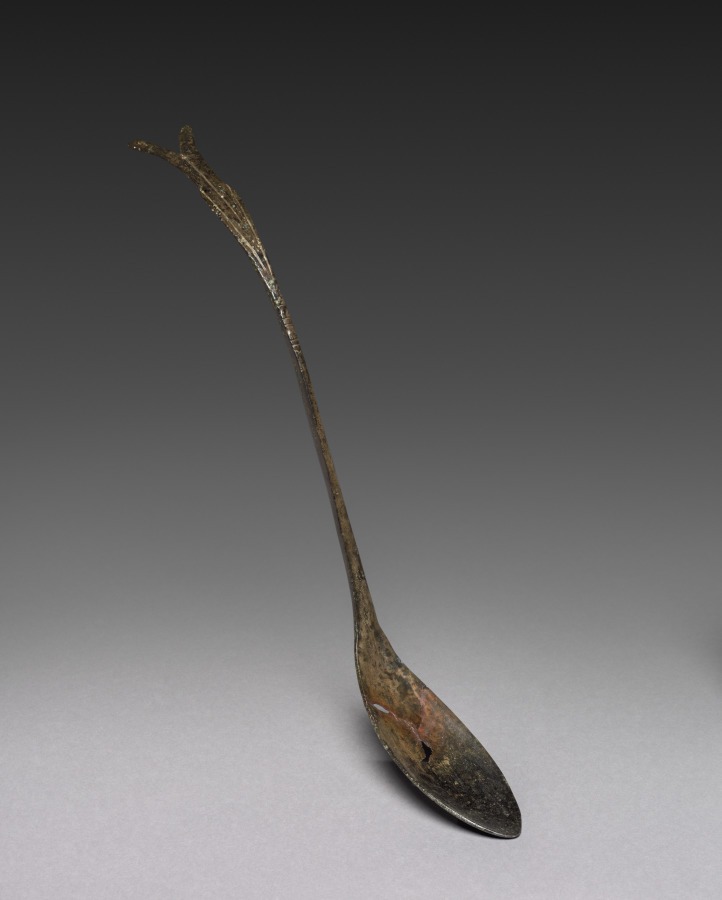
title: Spoon with Fish-Tail Design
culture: Korea, Goryeo dynasty (918–1392)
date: 918–1392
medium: silver bronze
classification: Metalwork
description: Many of Goryeo period spoons like this one feature a curved handle that splits into a jagged fishtail design. This fishtail design is not unique to Korea; it was also widely used in the area under the rule of two non-Han Chinese states: Liao (907–1125) and Jin (1115–1234). These seemingly ordinary objects testify to exciting material interactions between the Goryeo dynasty and non-Han Chinese northern states, which were often omitted from the official records.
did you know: Bronze spoons are the most common burial item. Scholars have proposed that toward the end of the 1300s, Koreans enjoyed meat-based soups more than any other dishes, explaining why spoons became common household items as well as burial goods.